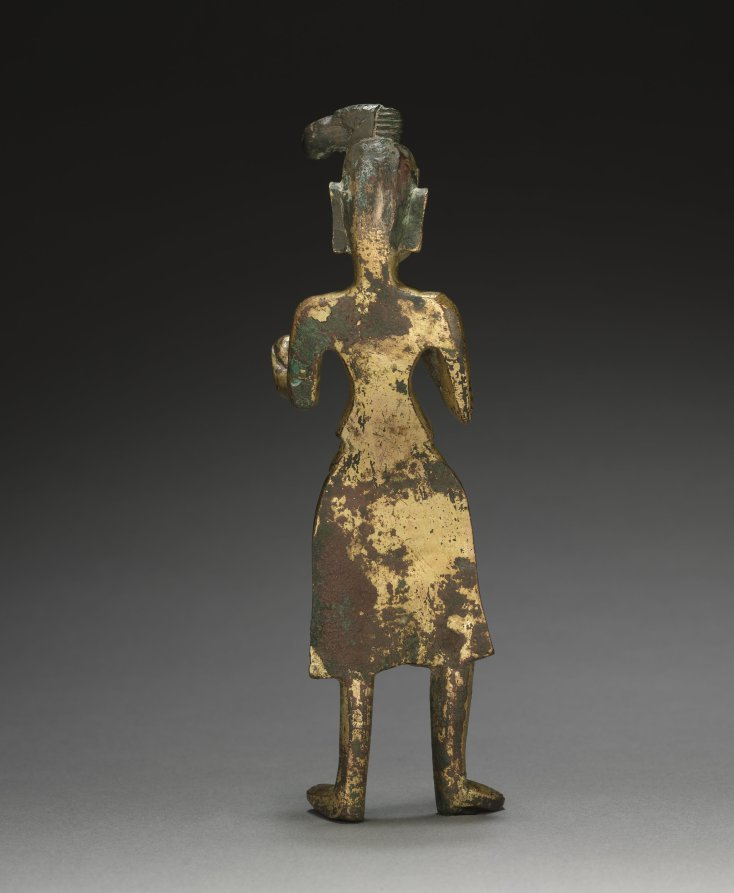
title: Ascetic Holding a Skull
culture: China, Northern Wei dynasty (386-534)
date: c. 500 CE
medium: gilt bronze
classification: Sculpture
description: The figure holding the skull has been identified as Mrgasirsa, who sought Buddha’s teaching on how to determine the karma and transmigration of the arhats. Mrgasirsa appears with Vasistha in some of the wall paintings of the Mogao grottoes in Dunhuang.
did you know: This grimacing figure has a potbelly protruding between the hem of his short jacket and fringed skirt (dhoti).